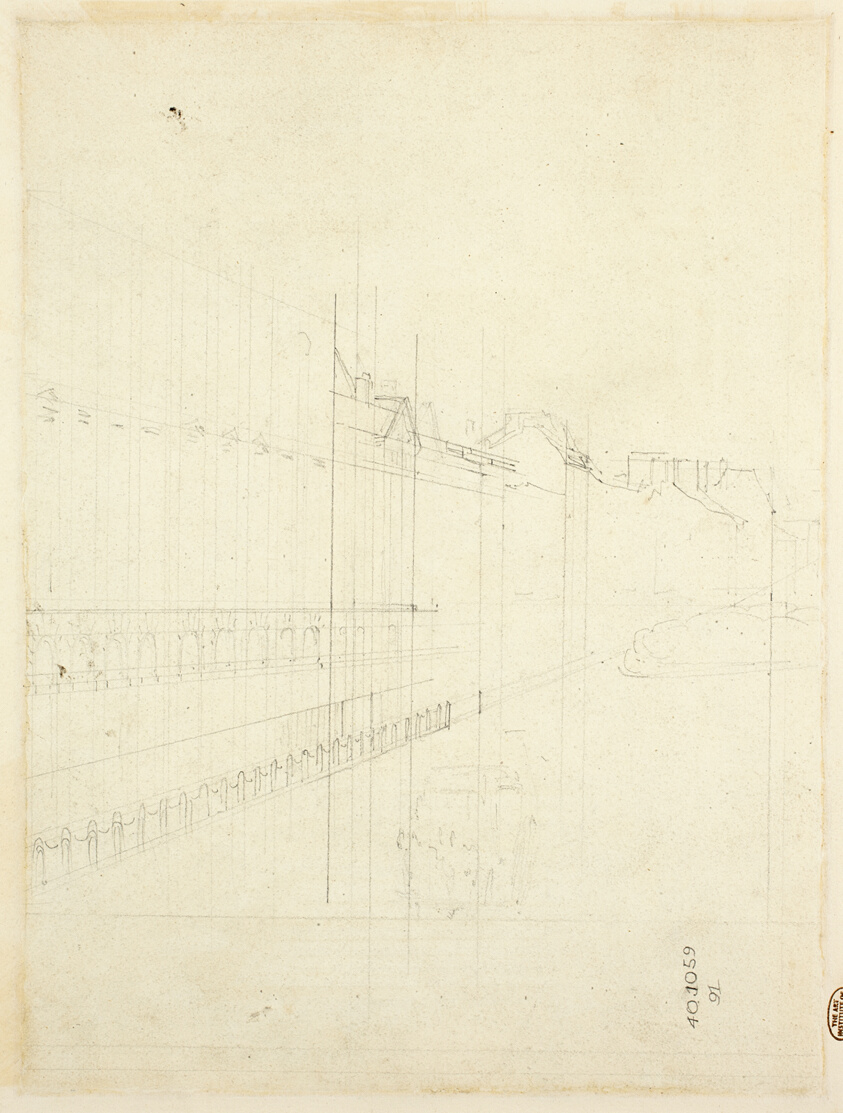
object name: Drawing and Watercolor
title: Study for Trinity House, from Microcosm of London (recto); Architectural Sketch of Row House Facades (verso)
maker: Augustus Charles Pugin (English, born France, 1762-1832); Thomas Rowlandson (English, 1756-1827)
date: c. 1809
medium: Graphite (recto and verso) on ivory wove paper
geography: England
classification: graphite; drawings (visual works); prints and drawing